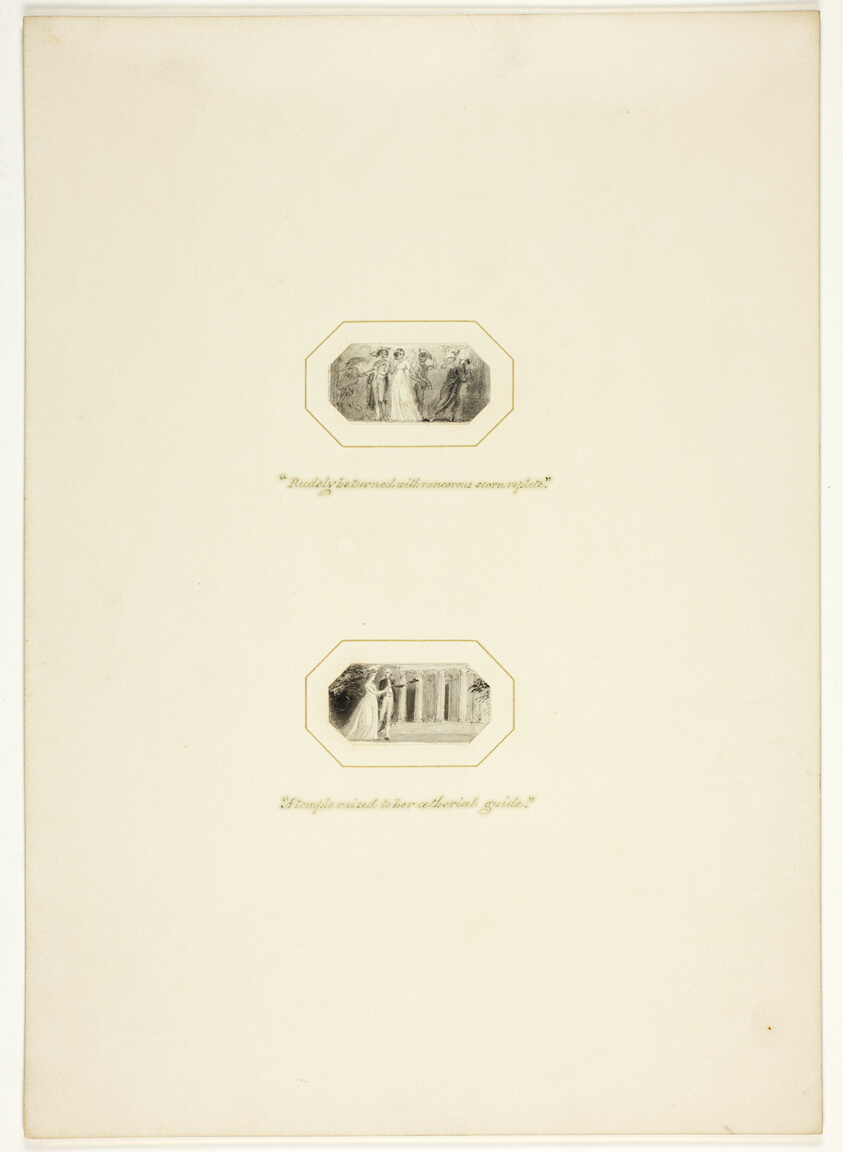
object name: Drawing and Watercolor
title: Study for a plate from The Triumphs of Temper, in the 1796 Royal Engagements Pocket Book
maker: Thomas Stothard (English, 1755-1834)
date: c. 1795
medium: Ink wash on paper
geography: England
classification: ink or chalk wash; drawings (visual works); prints and drawing